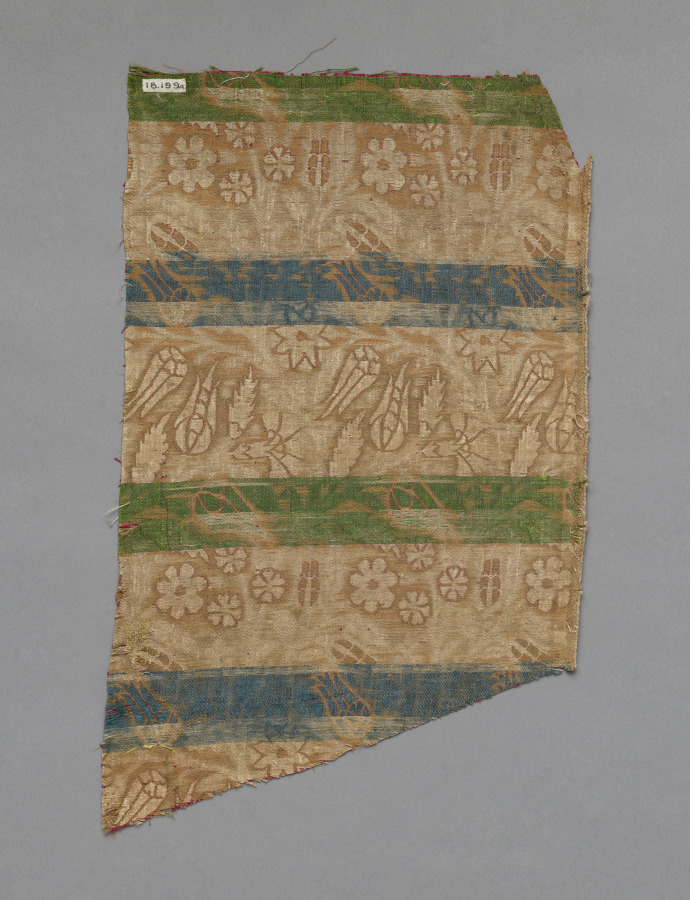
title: Textile Fragment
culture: Turkey, Bursa, 16th century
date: 16th century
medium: brocaded silk with metal thread weft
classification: Textile